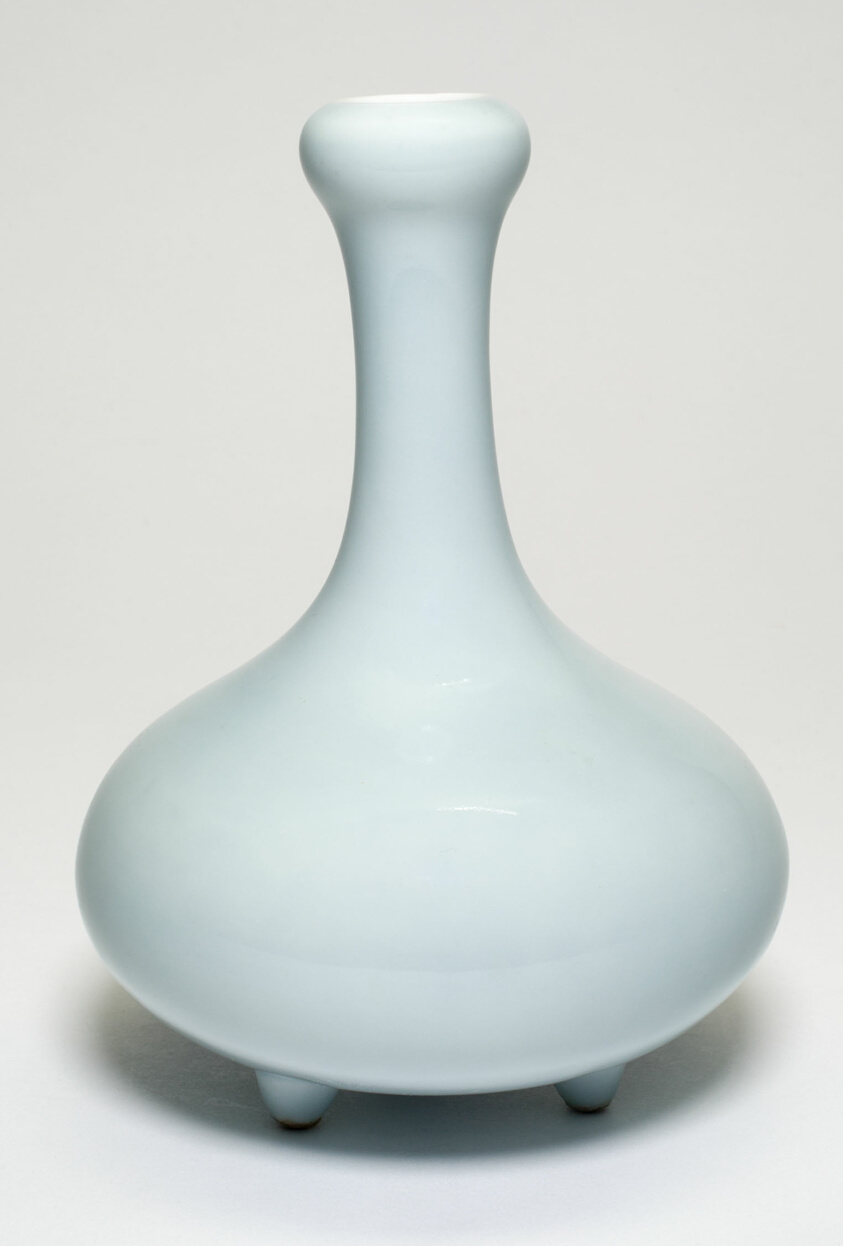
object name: Decorative Arts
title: Globular Vase with Tall Neck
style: Chinese (culture or style)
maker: China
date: Qing dynasty (1644–1911), Qianlong reign mark and period (1736–1795)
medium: Porcelain with clair de lune glaze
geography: China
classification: vase; porcelain; vessel; asian art; ceramics; decorative arts